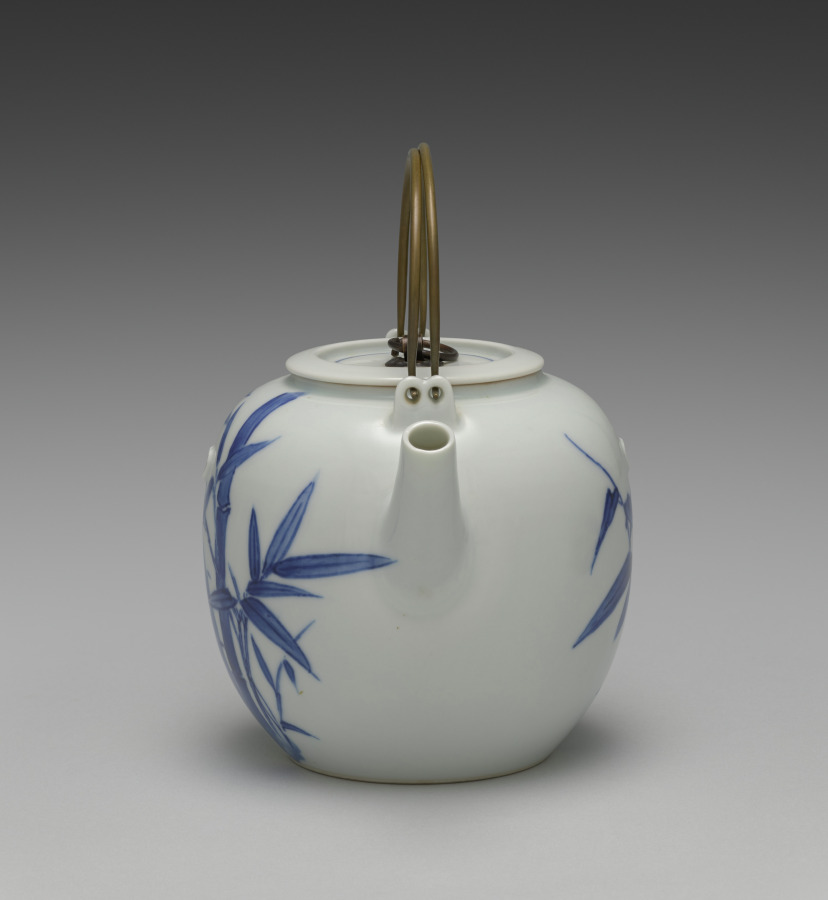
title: Teapot with Bamboo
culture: Japan, Taishō period (1912–26) or Shōwa period (1926–89)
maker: Seifū Yohei IV (Japanese, 1872–1951)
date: 1914–46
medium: Porcelain with underglaze blue, molded design and metal handles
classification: Ceramic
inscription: 清風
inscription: 清風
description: This teapot has a well-balanced design of bamboo in underglaze blue and nyoi staff-head motifs applied to both sides at the shoulder.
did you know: There is a seal on the base of the teapot.